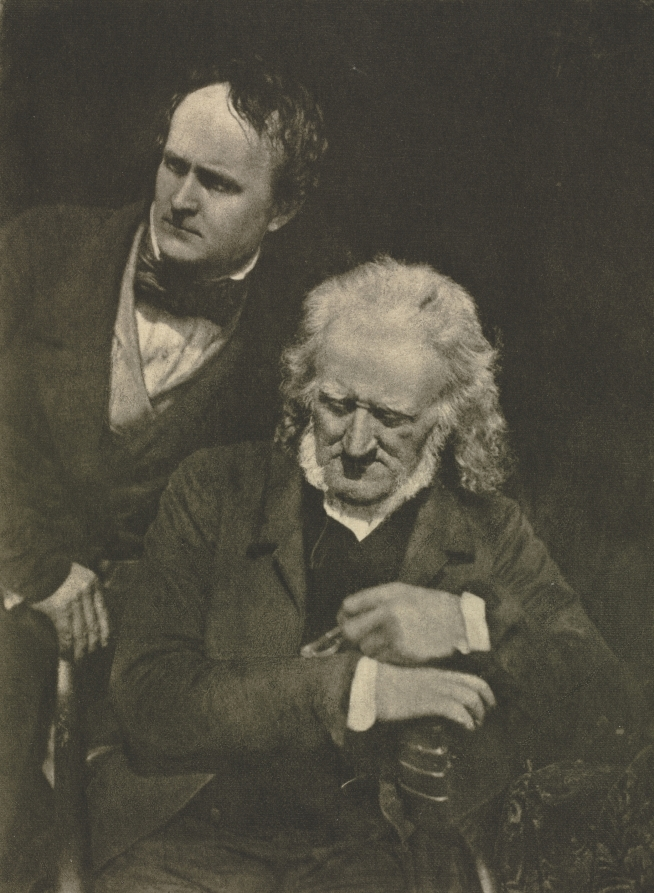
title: Camera Work: Handyside Ritchie and Wm. Henning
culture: England, 20th century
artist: David Octavius Hill (British, 1802–1870)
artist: and Robert Adamson (British, 1821–1848)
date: 1912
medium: photogravure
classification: Bound Volume